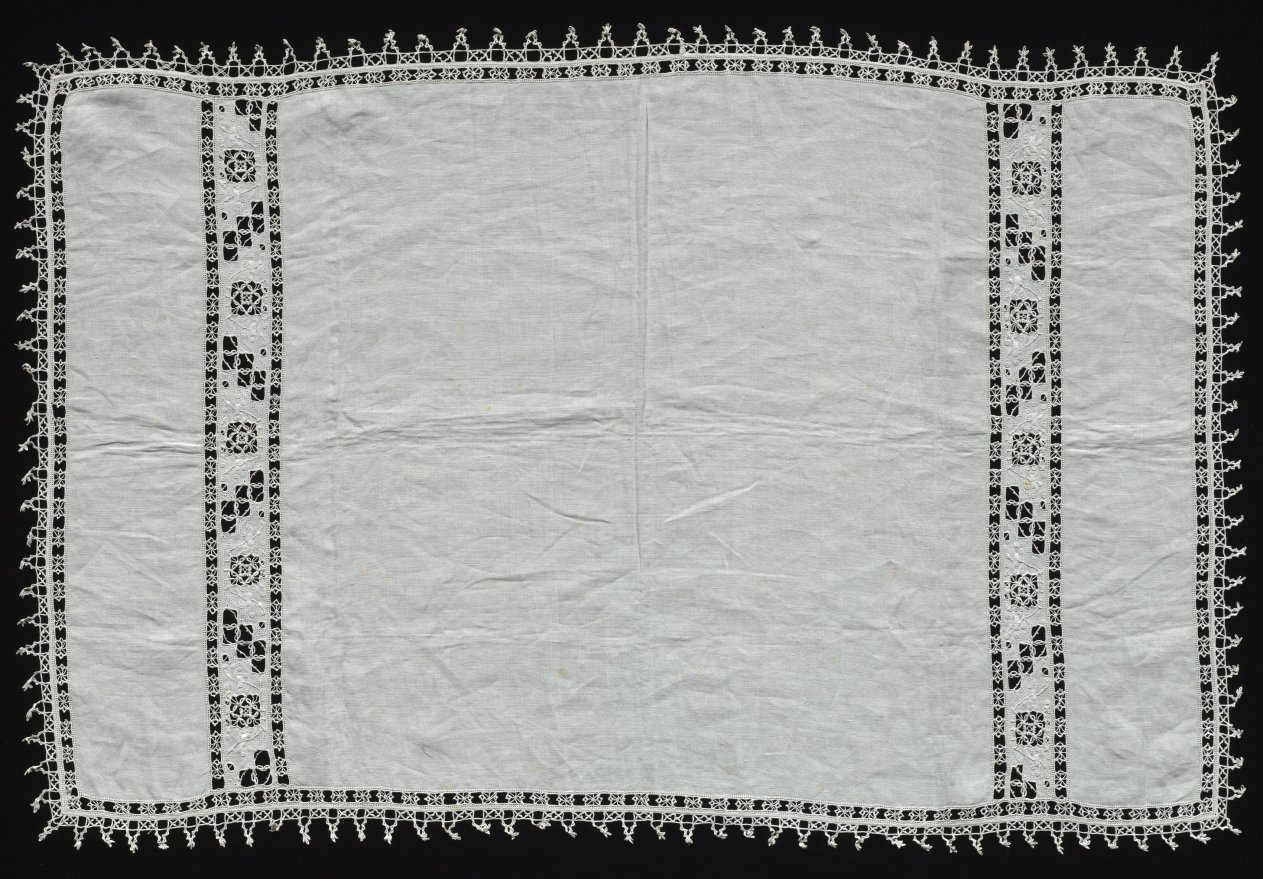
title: Lace Cloth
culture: Italy, Venice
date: 1500s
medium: Linen: needle lace (cutwork) and bobbin lace edging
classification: Lace